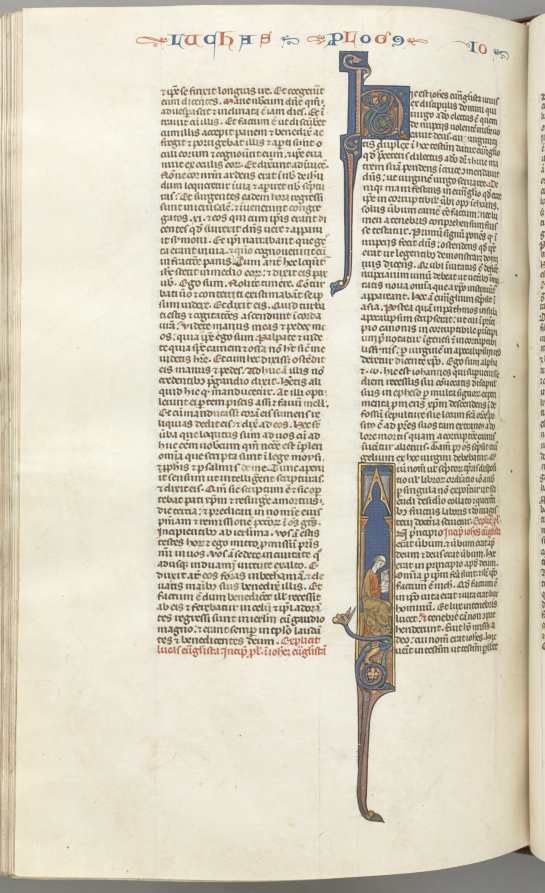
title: Fol. 425v, John, historiated initial I, John seated writing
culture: Southern France, Toulouse(?), 13th century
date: c. 1275–1300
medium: ink, tempera and gold on vellum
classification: Bound Volume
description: Biblical manuscripts were highly prized and important possessions of churches, monasteries, cathedral schools, and universities throughout medieval Europe. The biblical texts were known as the vulgate, the translations made by Saint Jerome in the fourth century from Hebrew and Greek into Latin, which became the definitive and official Latin version of the Roman Church. In the 13th century, the bible was, for the first time, produced as a single volume with an officially sanctioned sequence to its books and chapters as illustrated by this example. The very extensive decoration of this bible is arranged hierarchically to indicate the relative importance of the various texts so that full or almost full-page initials mark the openings of the first prologue, Genesis, and the first Gospel; historiated initials mark the beginning of each book and illuminated initials mark the Prologues.